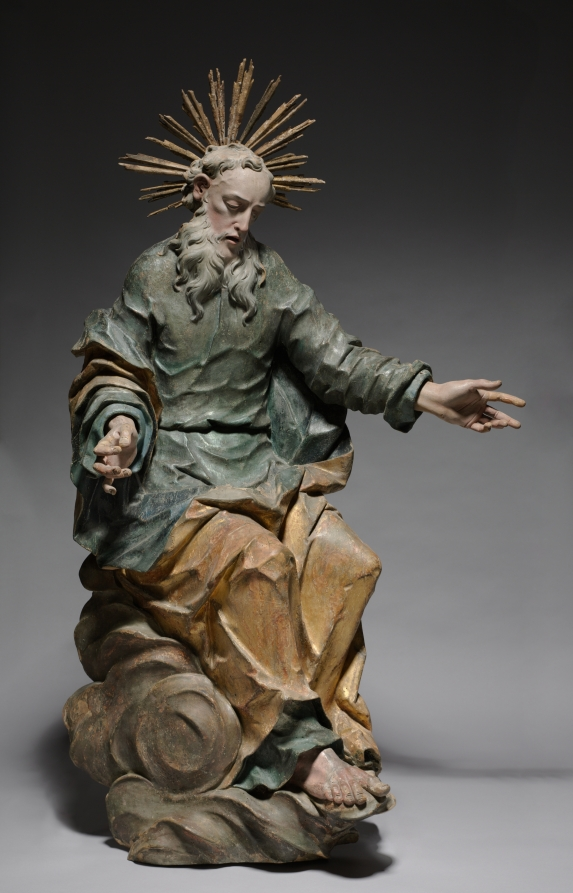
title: God the Father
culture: Austria, Lambach, 18th century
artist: Johann Peter Schwanthaler (Austrian, 1720–1795)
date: c. 1760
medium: painted and gilded wood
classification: Sculpture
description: Johann Peter Schwanthaler belonged to a renowned family of sculptors that produced works for religious and domestic settings throughout Bavaria, Austria, and southern Germany for more than 250 years. This imposing image of God the Father would have formed part of a larger group, probably at the top of an altar. The figure displays the characteristic features of Schwanthaler’s style, such as the elongated figural proportions, sharp-edged drapery folds, and the beautifully expressive, anatomically detailed hands.